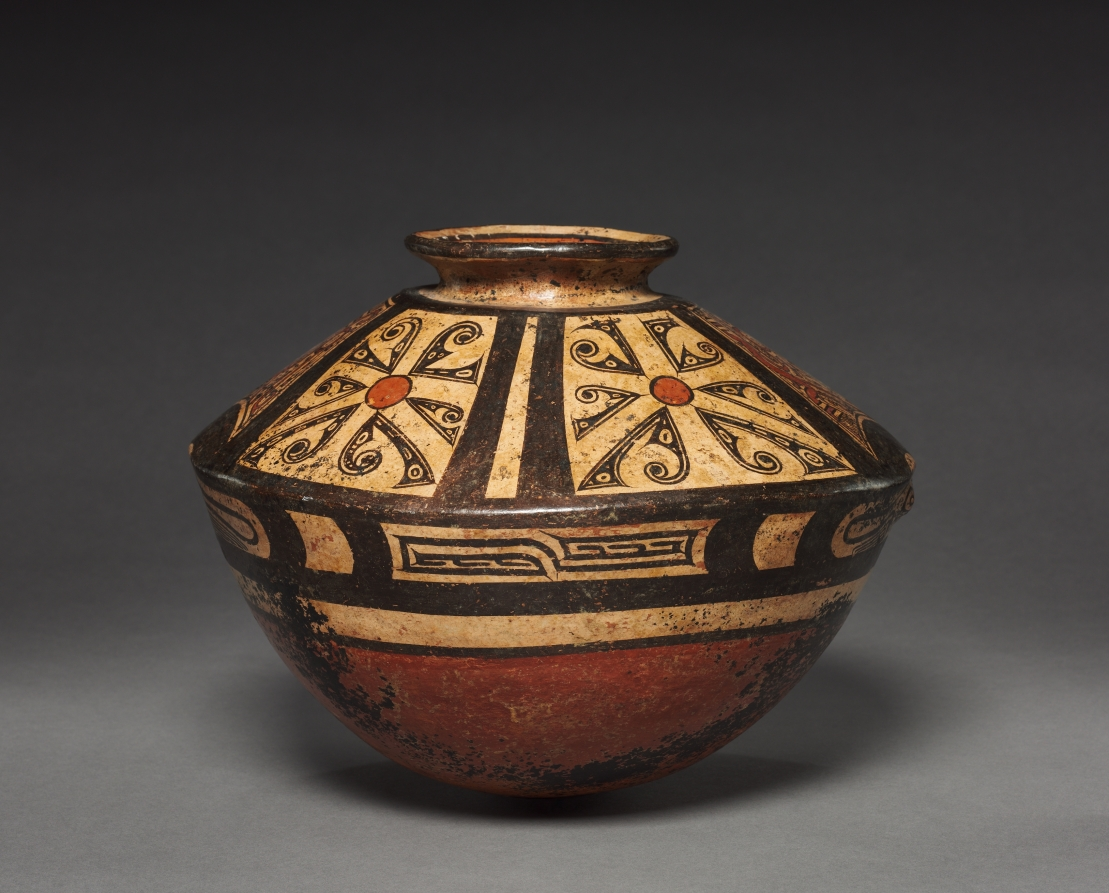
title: Vessel: Turtle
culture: Panama, Parita style, 11th-14th century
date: 1000–1300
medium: ceramic, slip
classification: Ceramic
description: Many Panamanian ceramics are among the most handsome and deftly designed in the Americas. Note how cleverly the artist used the vessel shape to imitate a turtle's carapace, its head peering out from its shell, its feet painted on the back (no. 10). And the stingray floats atop its pedestal, as though gliding through water (no. 9). Lamentably, little is known about the meaning of these witty ceramics.